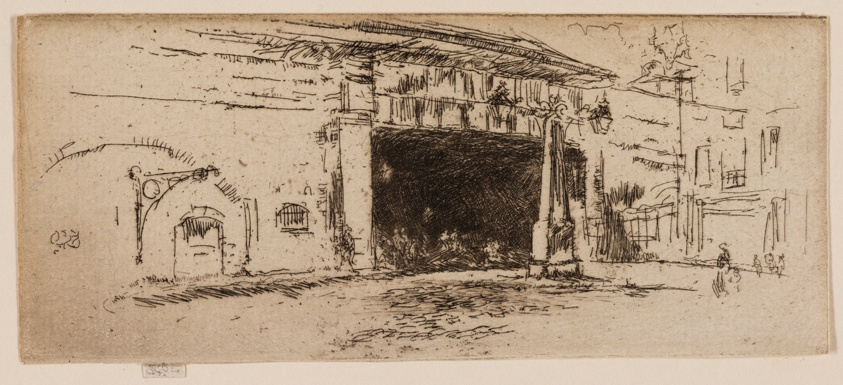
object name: Print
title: Railway Arch, American Square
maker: James McNeill Whistler (American, 1834-1903)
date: 1887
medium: Etching with foul biting in black ink on off-white laid paper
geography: United States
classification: etching; foul biting; print; prints and drawing; paper